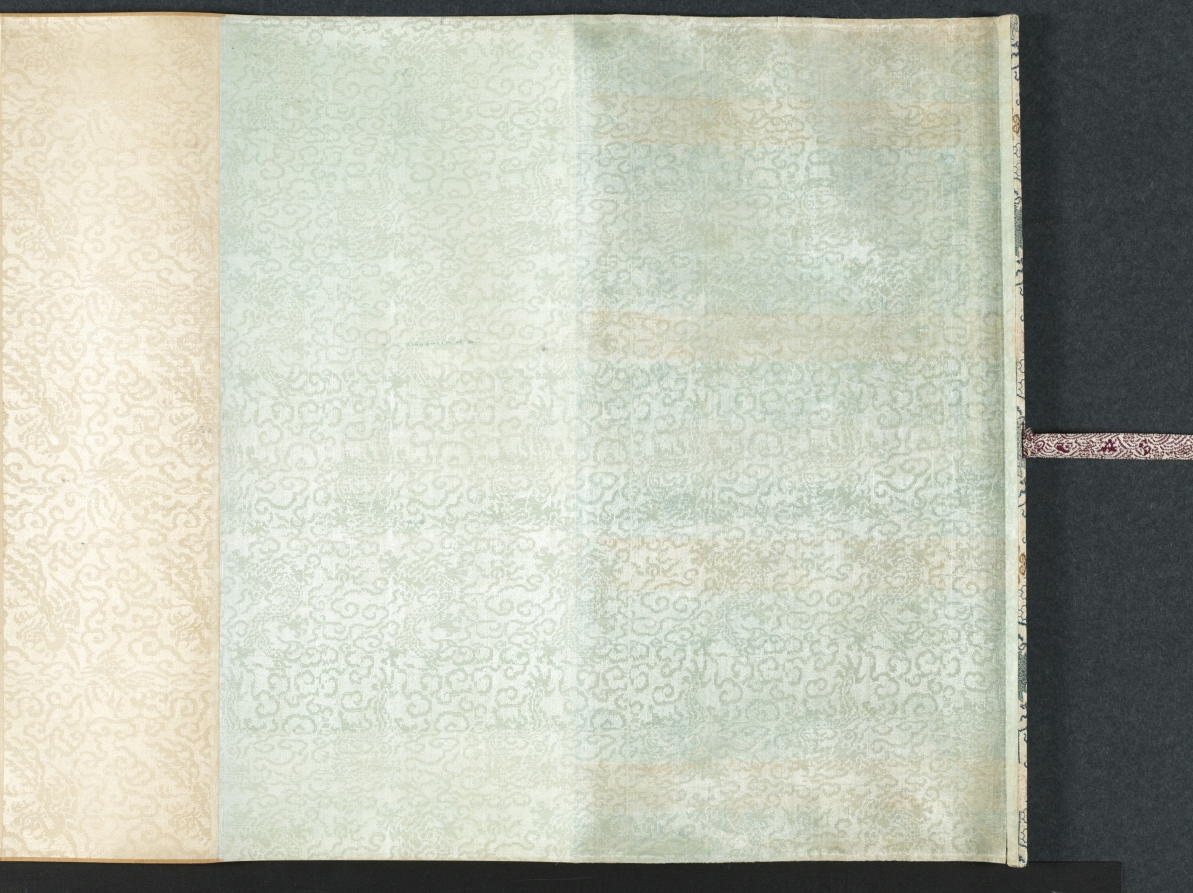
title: Cloudy Mountains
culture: China, Southern Song dynasty (1127-1279)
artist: Mi Youren (Chinese, 1072–1151)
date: 1130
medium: Handscroll; ink and color on silk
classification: Painting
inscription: 好山無數接天涯，烟靄陰晴日夕佳。/ 要識先生會到此，故留筆戲在君家。/ 庚戍歲，辟地新昌作。元暉。/ [seal] 元暉戲作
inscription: [Seal] 安陽孫氏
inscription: [Seal] 畢瀧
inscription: [Seal] 成親王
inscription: [Seal] 永瑆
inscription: [Seal] 錫三 appears twice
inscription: [Seal] 養性齋珍藏書畫印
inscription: [Seal] 芷陔審定真跡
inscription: [Seal] 玉簡齋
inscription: 2 colophons (1 dated 1650), inscription dated 1647, and 2 seals of Wang To (1592–1652)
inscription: 1 colophon, dated second month of the gengyin year 庚寅 (1650), and 2 seals of Chen Kuang 陳爌 (1646 jinshi degree)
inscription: 7 seals unidentified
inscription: A separate scroll containing six colophons on Cloudy Mountains exists; the inscribers are Luo Zhenyu 羅振玉 (1866–1940), Naito Torajiro 內藤虎次郎 (1866–1934), Nagao Ko 長尾甲 (1864–1942), and Wu Changshuo 吳昌碩 (1844–1927). Naito Torajiro alone wrote three colophons.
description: Cloudy Mountains captures the view of a lush and misty riverscape, an impression of Mi Youren’s new environment, painted in a moment of peace. With the fall of the Northern Song dynasty in 1127 upon the Jurchen’s military invasion, Mi Youren fled south across the Yangzi River. In 1130, he had reached Xinchang in Zhejiang province and thanked his host with this painting for having given him shelter. Mi Youren was the oldest son of the art critic Mi Fu (1051– 1107); both developed a distinct style of mountain scenery by accumulating wet ink dots that create a hazy atmosphere.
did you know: This scroll is one of the museum’s earliest dated Chinese paintings.